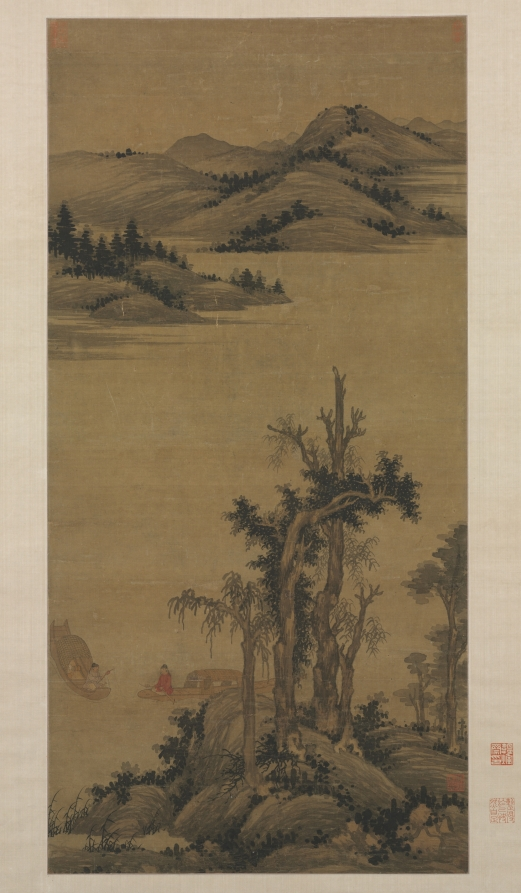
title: Fishermen-Hermits in Stream and Mountain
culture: China, Yuan dynasty (1271-1368)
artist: Zhao Yong (Chinese, c. 1289-c. 1362)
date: 1300s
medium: Hanging scroll; ink and color on silk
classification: Painting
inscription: 仲穆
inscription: [印] 吳興張氏圖書之記; [印] 心賞; [印] 張珩私印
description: In this typical southern two shores divided by a river composition, two fishermen, each seated in the stern of his covered houseboat, troll their hooks in the swirling water, holding short rods fitted with spooling reels. Zhao Yong was a son of the southern calligrapher and statesman Zhao Mengfu, who, like his father was a scholar-official in the Mongol-Yuan government. As public servants of the Yuan state and administration, scholar-artists like the Zhaos delighted in paintings that pictured them in nature as fishermen amid vistas of Jiangnan, which they considered their home.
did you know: The composition of two shores divided by a river was mostly famously associated with the Yuan painter Ni Zan.